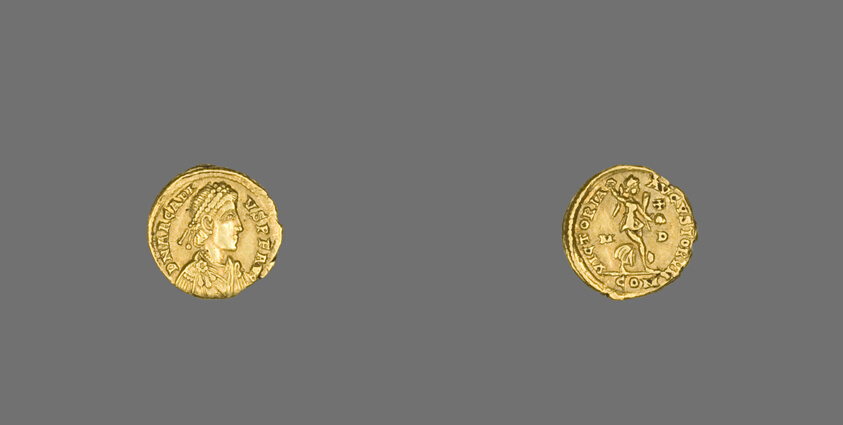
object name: Coin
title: Tremissis (Coin) Portraying Emperor Arcadius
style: roman (ancient, style or period), ancient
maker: Roman, minted in Mediolanum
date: 394-395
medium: Gold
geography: Milan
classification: coin; ancient art